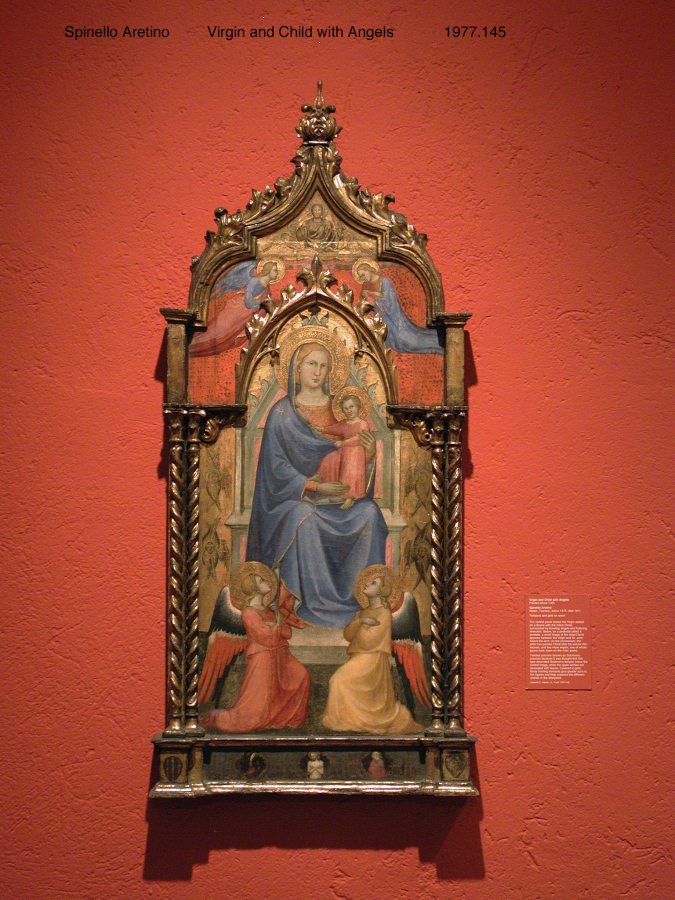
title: Virgin and Child with Angels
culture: Italy, early 15th Century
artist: Spinello Aretino (Italian, 1350/52–1410)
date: 1405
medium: tempera and gold on wood panel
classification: Painting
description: This central panel from an altarpiece shows the Madonna seated on a throne with the infant Christ, surrounded by kneeling angels and six-winged seraphim. Below is an image of the dead Christ flanked by the Virgin Mary and Saint John. Above the arch is the Blessing Christ after his ascent into heaven and two more angels who gaze down on the main scene. Together these images extol the role of the Madonna in the redemption of humankind. Spinello Aretino was a painter of devotional panels, altarpieces, and frescos. His most important commissions were painted in Arezzo, Lucca, Florence, Pisa, and Siena. His concern for space and the powerful outlines of his figures reflect a greater understanding of the principles developed by Giotto and his contemporaries, yet his keen sense of decoration reveals an equal awareness of Sienese painting.